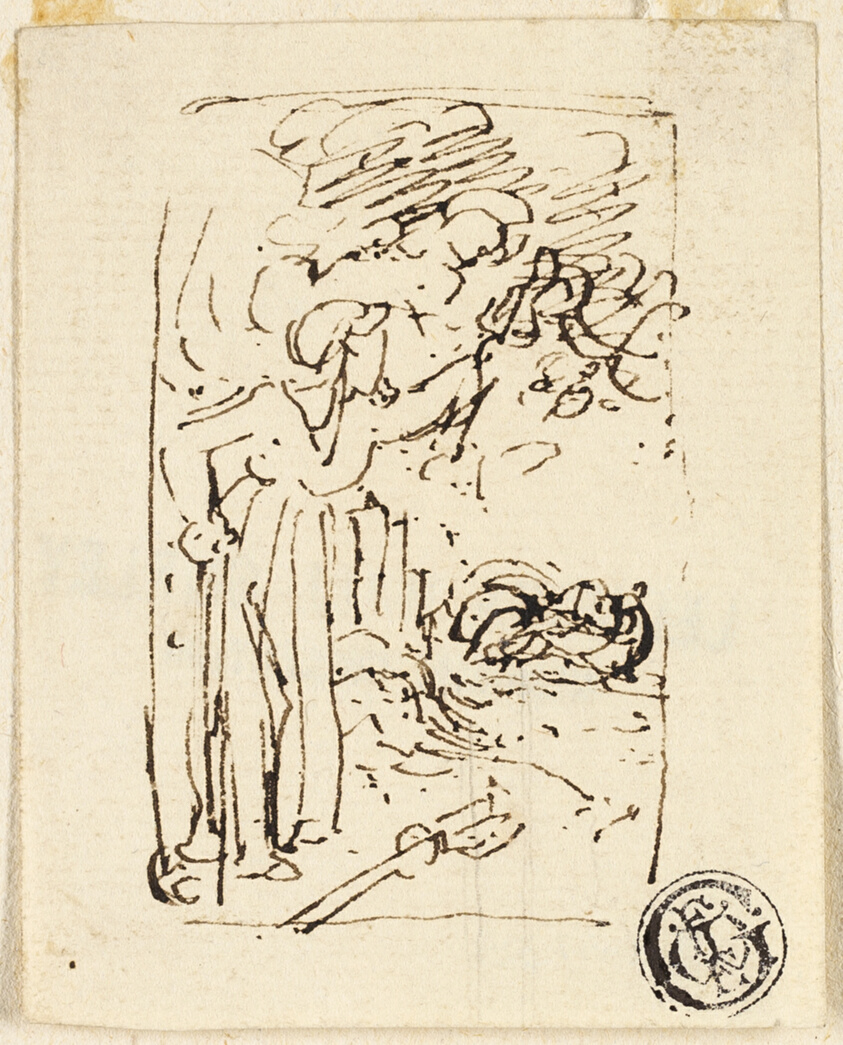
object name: Drawing and Watercolor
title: Sketch of Figure Leaning on Cane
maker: Attributed to Thomas Stothard; English, 1755-1834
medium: Pen and brown ink on cream laid paper, tipped onto cream wove paper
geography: England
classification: pen and ink drawings; drawings (visual works); prints and drawing